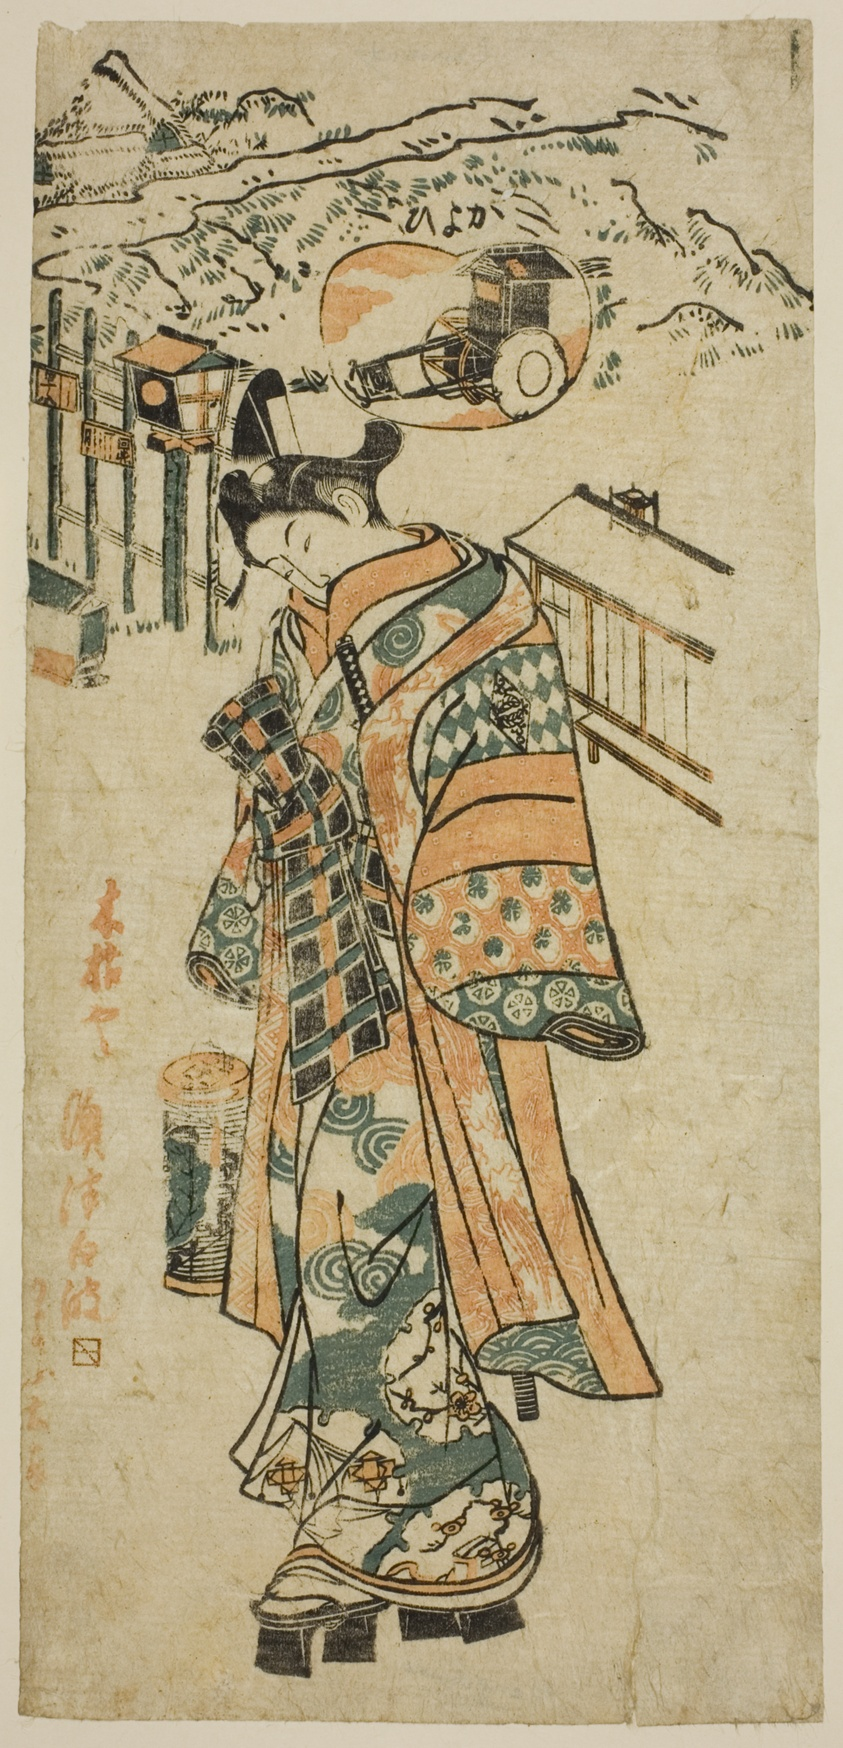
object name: Print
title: Visiting (Kayoi) - a parody of Shosho visiting Komachi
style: Japanese (culture or style)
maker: Attributed to Mangetsudo; Japanese, active 1740s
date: c. 1740s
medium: Color woodblock print; right sheet of hosoban triptych, benizuri-e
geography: Japan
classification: woodblock print; print; asian art